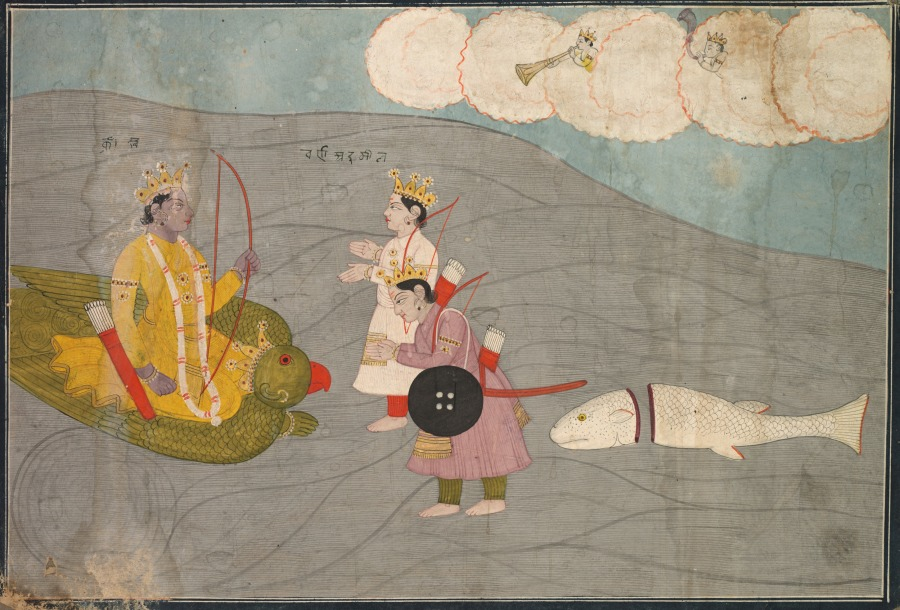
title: Vanasura's Sons Submit to Krishna: Scene from the Aniruddha Usha Section of Krishna Lila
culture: India, Pahari, possibly Garhwal, 19th century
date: c. 1840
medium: Gum tempera, ink, and gold on paper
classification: Painting